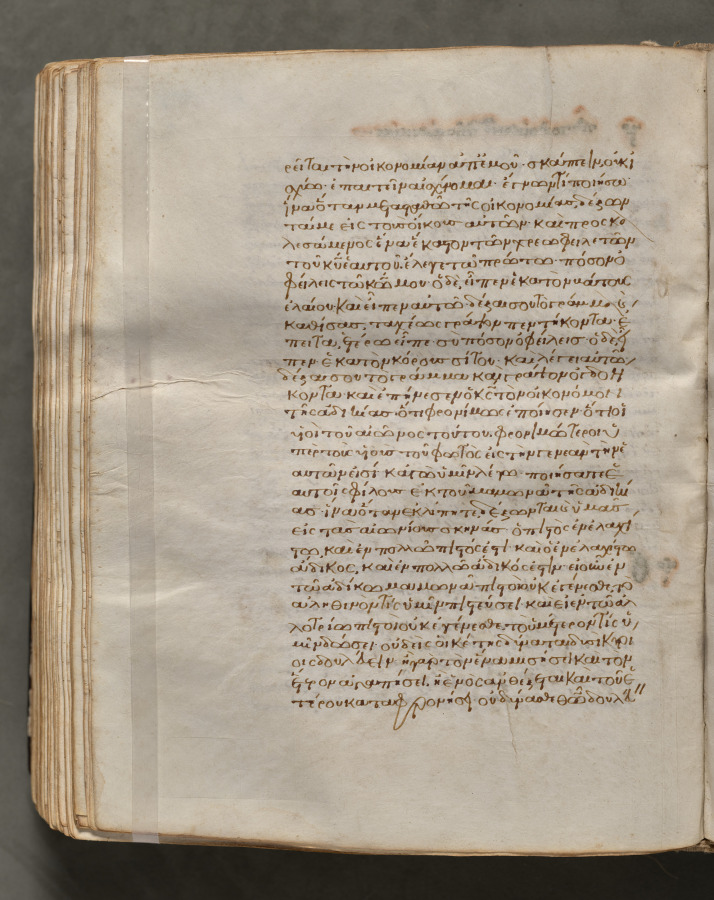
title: Text, folio 283 (verso), from a Gospel Book with Commentaries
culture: Byzantium, Constantinople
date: c. 1000–1100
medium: ink, tempera, and gold on vellum; leather binding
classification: Bound Volume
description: Each of the four gospels in this book opens on a page with brilliantly illuminated borders depicting the author of the text as well as birds—principally peacocks, symbols of the immortality of the soul—and fountains, representing the fountain of life and the salvation of the soul. This volume consists of 428 leaves with texts in Greek. Its level of sophistication suggests that it was probably written and decorated in a monastery in Constantinople.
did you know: Gospel books were carried in procession through Byzantine churches.